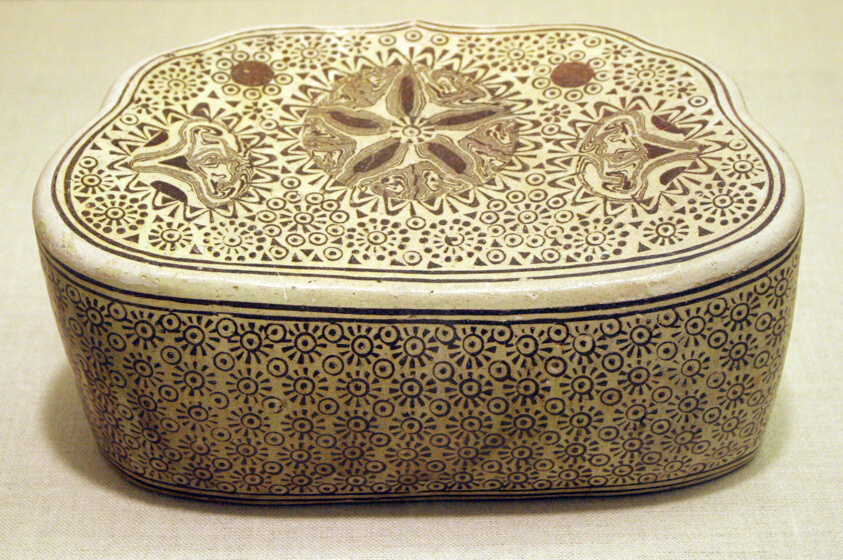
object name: Decorative Arts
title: Cloud-Shaped Pillow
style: Chinese (culture or style)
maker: China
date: Northern Song dynasty (960–1127), late 10th century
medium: Cizhou ware; stoneware, slip-coated with underglaze marbled, inlaid, and impressed decoration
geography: China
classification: stoneware; ceramics; asian art; decorative arts